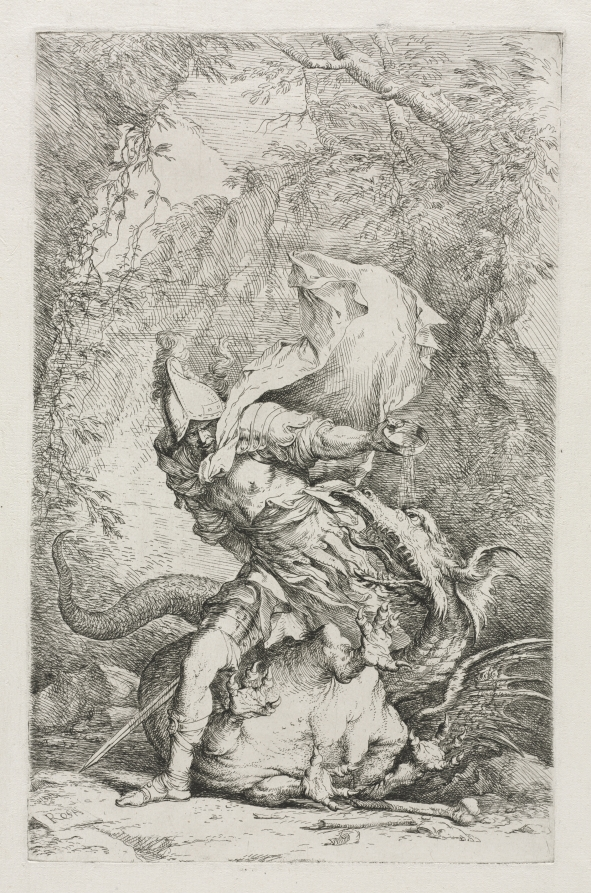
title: Jason and the Dragon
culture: Italy, 17th century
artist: Salvator Rosa (Italian, 1615–1673)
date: c. 1663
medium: etching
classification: Print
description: Jason's quest for the Golden Fleece required him to bypass a fearsome dragon, which he was able to do with a sleeping potion given to him by the witch Medea. Salvatore Rosa selected classical narratives to prove he was a great and learned painter of histories, and he showcased the novelty of being among the first 16th- or 17th-century artists to portray this particular story. Rosa turned the ancient epic into a moody struggle by transmitting the mystery and magic of his earlier witchcraft imagery. Utilizing the energetic and spontaneous qualities of his draftsmanship, the violence of Jason's feat is emphasized by a claustrophobic and savage environment of crags and "blasted" trees that frames the dynamic diagonals of the hero and recoiling dragon.